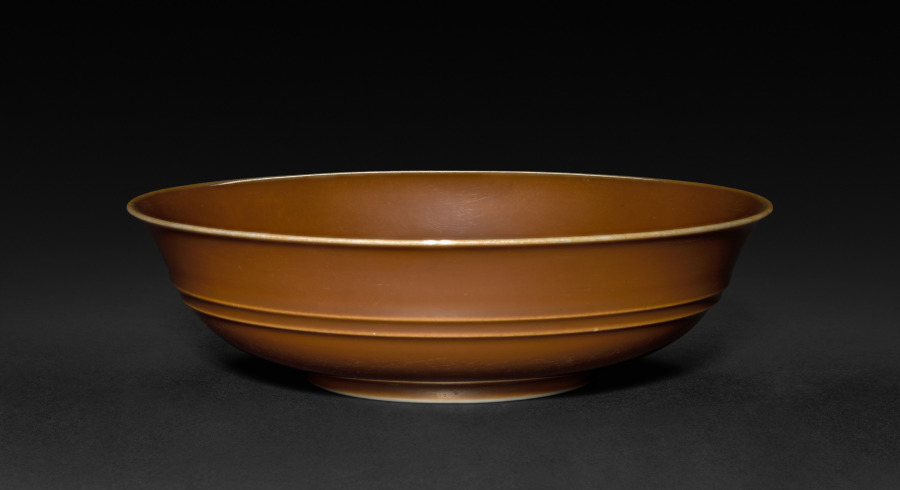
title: Dish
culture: China, Jiangxi province, Jingdezhen kilns, Qing dynasty (1644-1911), Yongzheng mark and reign (1723-35)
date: 1723–35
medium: porcelain with café-au-lait glaze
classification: Ceramic